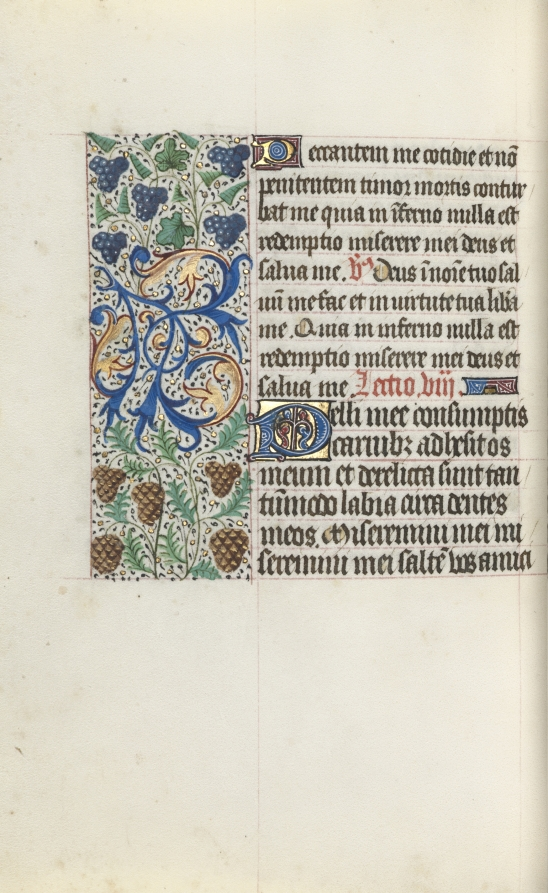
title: Book of Hours (Use of Rouen): fol. 131v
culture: France, Rouen, 15th century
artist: Master of the Geneva Latini (French, active Rouen, 1460–80)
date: c. 1470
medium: ink, tempera, and gold on vellum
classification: Bound Volume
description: In the late 1400s and early 1500s Rouen was an established and important center of book production. The city’s cathedral had a wealthy chapter that spent large sums of money to commission books and to maintain its extensive library. The stationers and booksellers would have likely been concentrated in or near the cathedral precinct. This artist, named after a manuscript now in Geneva, was Rouen’s principal illuminator during the second half of the 1400s.